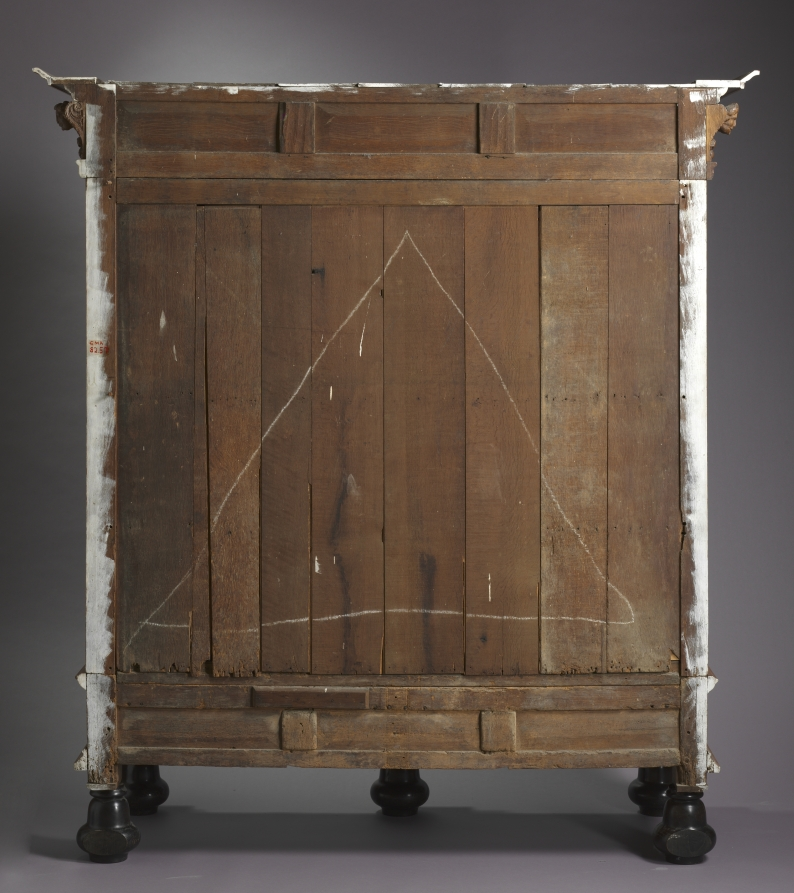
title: Wardrobe (Kast)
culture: Netherlands, Holland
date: c. 1625–50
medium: oak with ebony and rosewood veneers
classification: Furniture and woodwork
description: After the founding of the Dutch East India Company in 1602, the use of exotic, imported wood veneers in furniture became more prevalent. So too did the use of perspective and mathematical systems in laying out the veneers. The combination produced a style of decoration that spread across Europe and even to the young colonies in America.